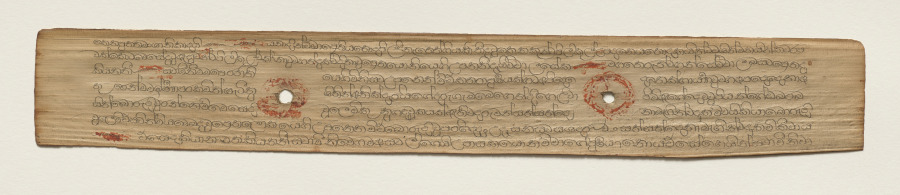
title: Leaf from a Buddhist Manuscript (verso)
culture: Sri Lanka, Singhalese, Late 17th century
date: c. 1700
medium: fiber paper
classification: Manuscript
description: Palm leaf material is still used for manuscripts in Sri Lanka. The palm leaves are prepared first by boiling them, drying them in the sun, and then rubbing them with oils. Scribes then use a metal stylus to incise the text. Then charcoal powder is wiped across the pages, filling in only the inscribed lines.